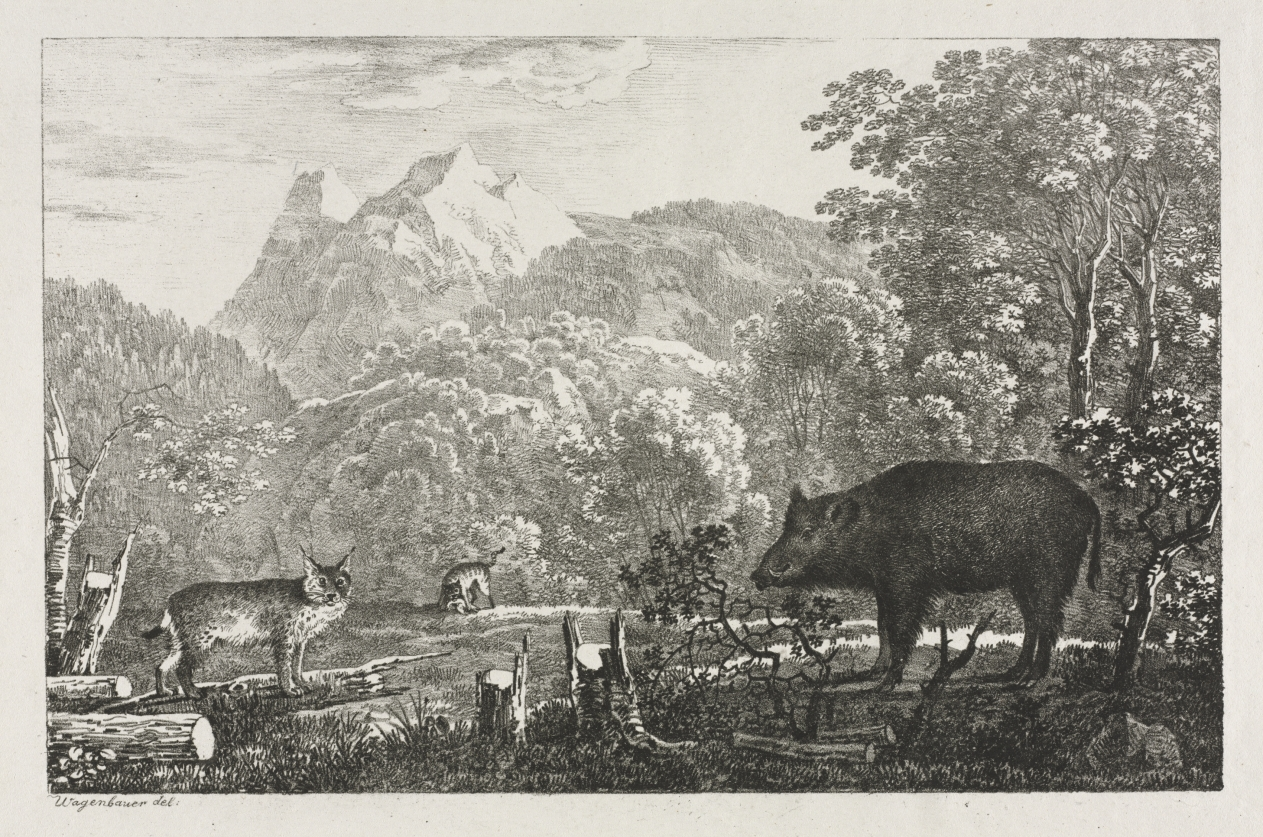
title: Wild Boar, Wildcat and Lynx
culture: Germany, 19th century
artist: Maximilian Josef Wagenbauer (German, 1774–1829)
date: 1807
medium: lithograph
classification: Print